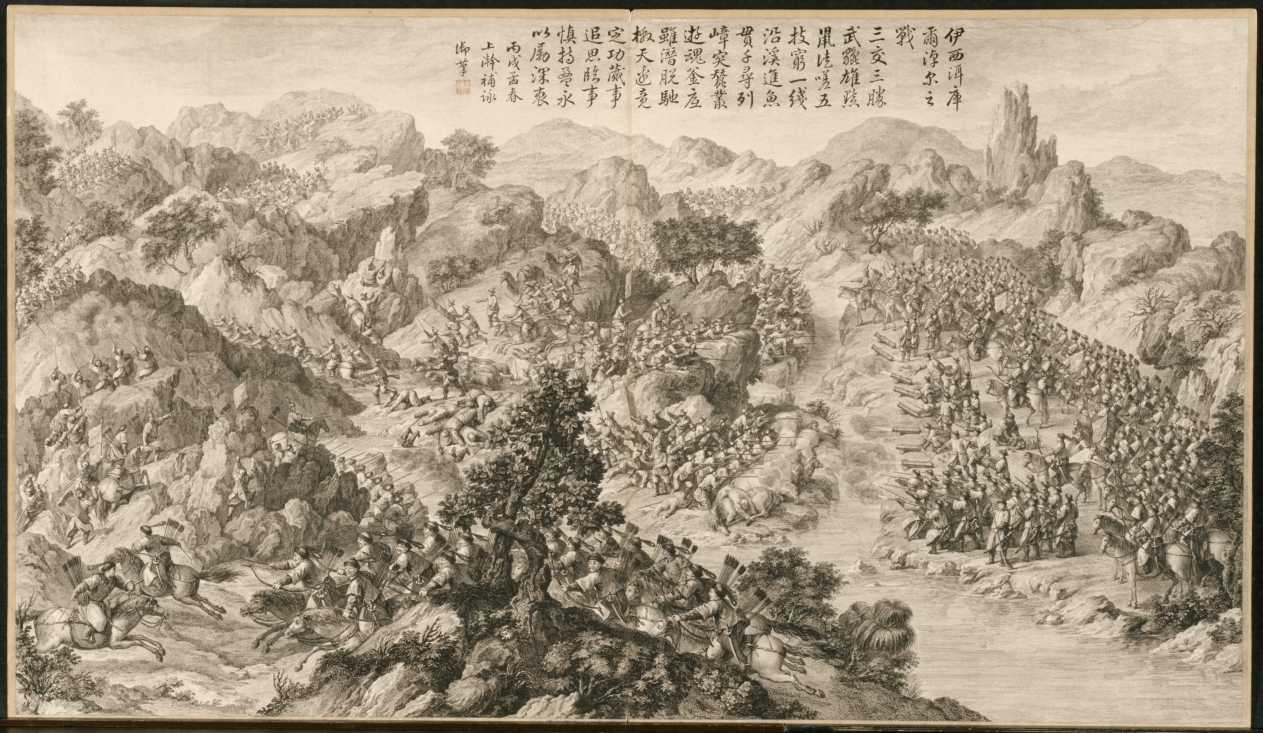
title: Battle at Yixi'er Ku'ernao'er: from Battle Scenes of the Quelling of Rebellions in the Western Regions, with Imperial Poems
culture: China, Qing dynasty (1644–1911), Qianlong reign (1736–95)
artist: Jean Damascene Sallusti (Italian, d. 1781)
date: c. 1765–74; poem dated 1766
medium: etching, mounted in album form, 16 leaves plus two additional leaves of inscriptions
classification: Print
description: This set of etchings was commissioned by Emperor Qianlong to record in pictorial terms the courage of his generals and soldiers in quelling the rebellions in the Western Regions. Qianlong added his own poem to each of the etchings, indicating his appreciation and pride in this demonstration of military might. "Western Regions" refers to the present-day Xingjiang province, often described in Western writing as "Central Asia."